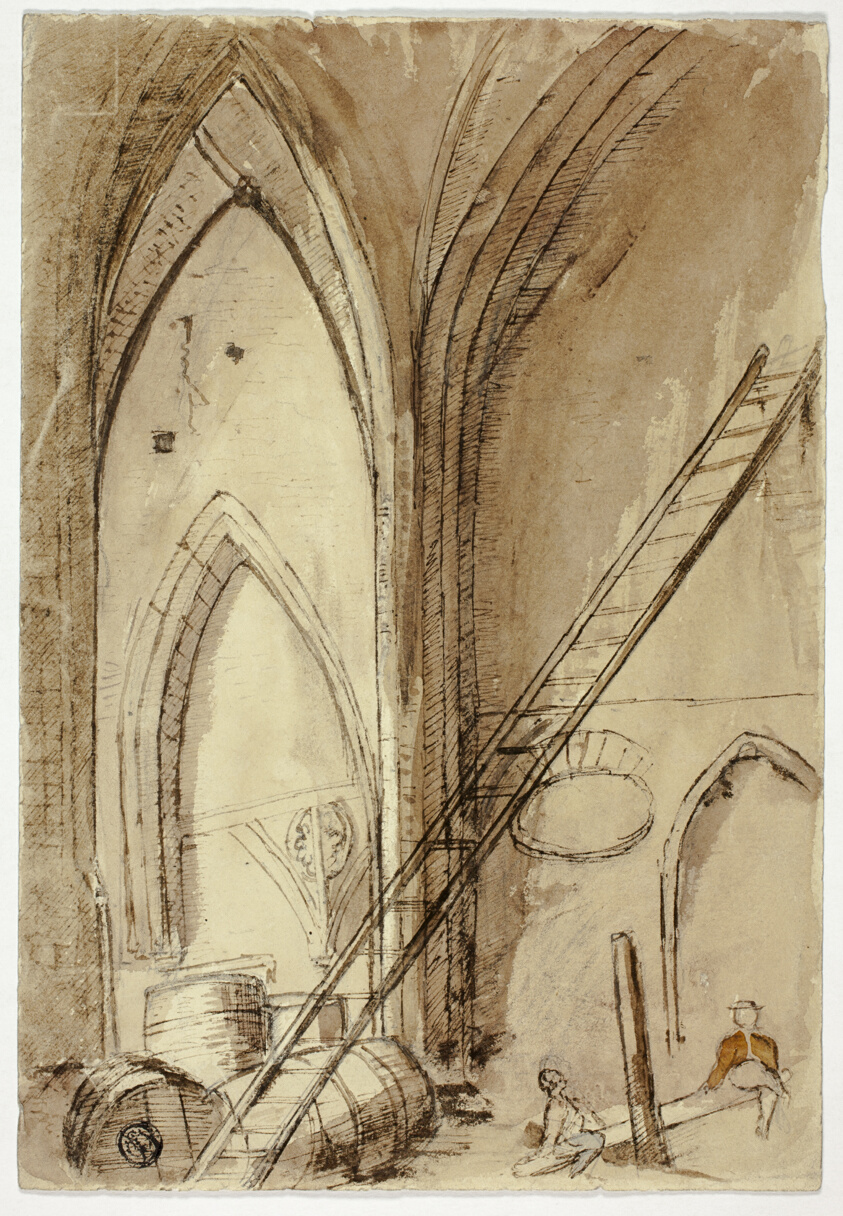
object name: Drawing and Watercolor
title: Teetertotter in Church Building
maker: Unknown artist (possibly British, 19th century)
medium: Pen and brown ink, with brush and brown, pink and orange wash, over graphite, on cream wove paper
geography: United Kingdom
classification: pen and ink drawings; drawings (visual works); prints and drawing